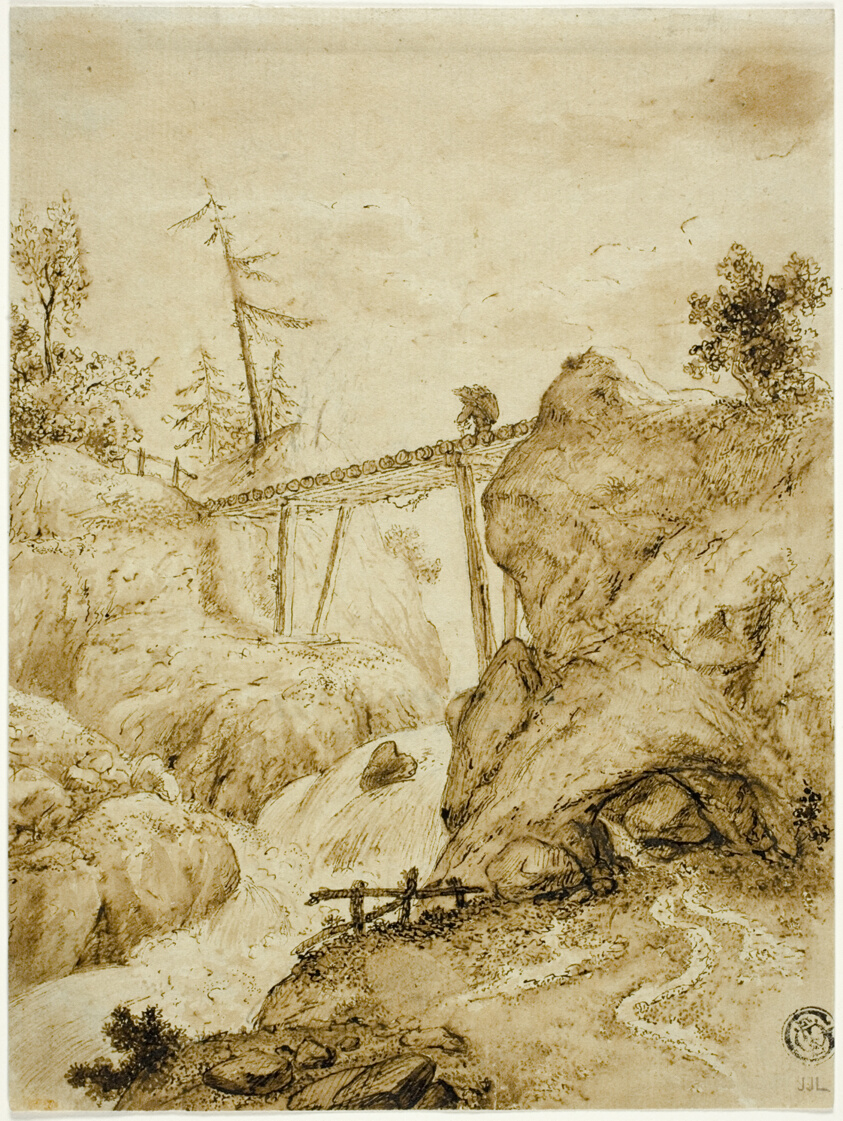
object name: Drawing and Watercolor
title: Man Crossing Log Bridge over Torrent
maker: Jan van Eyck (Netherlandish, c. 1390-1441); or style of Allart van Everdingen (Dutch, 1621-1675)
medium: Pen and brown ink, with brush and brown wash, over traces of graphite, on pale gray laid paper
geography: Netherlands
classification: ink or chalk wash; drawings (visual works); prints and drawing